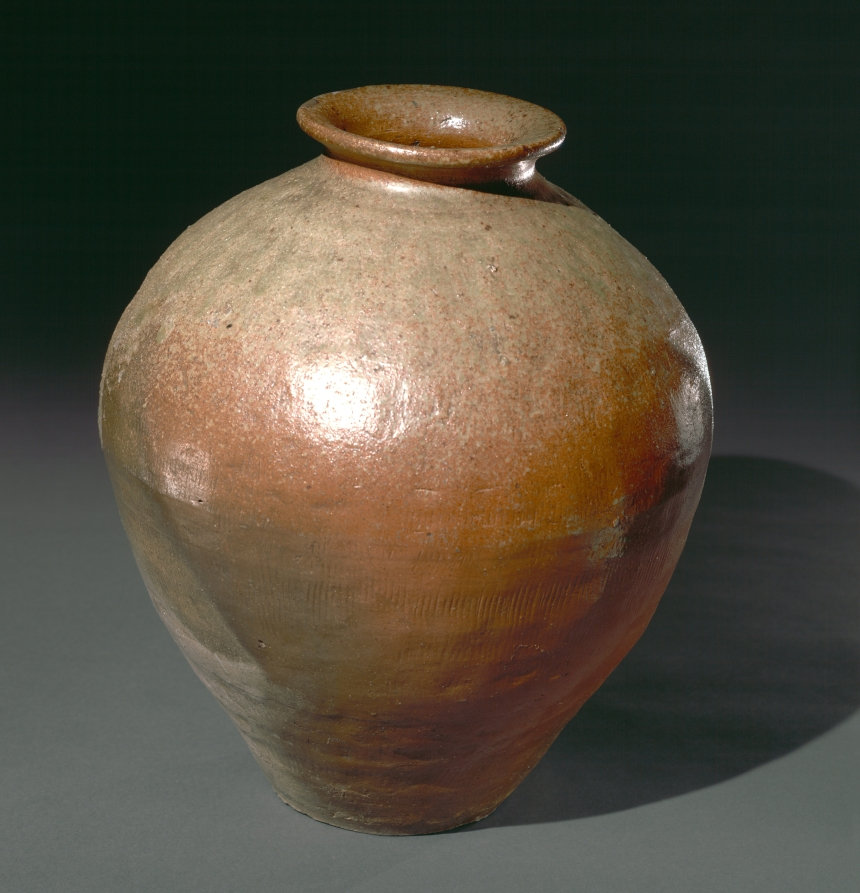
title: Storage Jar: Tamba Ware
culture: Japan, Muromachi period (1392–1573)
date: 1400s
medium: stoneware with natural ash glaze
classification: Ceramic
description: This vessel served as a storage container for rice or other grains in medieval farming communities. The piece was made by potters in Tamba, a fertile region west of Kyoto which used such vessels to send its agricultural products to towns throughout western Japan. Tamba ware is recognized by its warm green glaze, created as accumulations of natural wood ash settle on the clay body and liquefy when the kiln temperature is sufficiently high. The jar's contours reveal that it was built in four stages from many clay coils pressed together by hand. The smooth neck and mouth were wheel-turned. The vertical, incised lines visible on the reddish-brown body indicate where a comb-like tool scraped excess clay from the body wall; this technique helped conserve clay material and wood used in the firing. The scraping also exposes the grittiness of local Tamba clay, which in the 15th century did not undergo an extensive refining process.